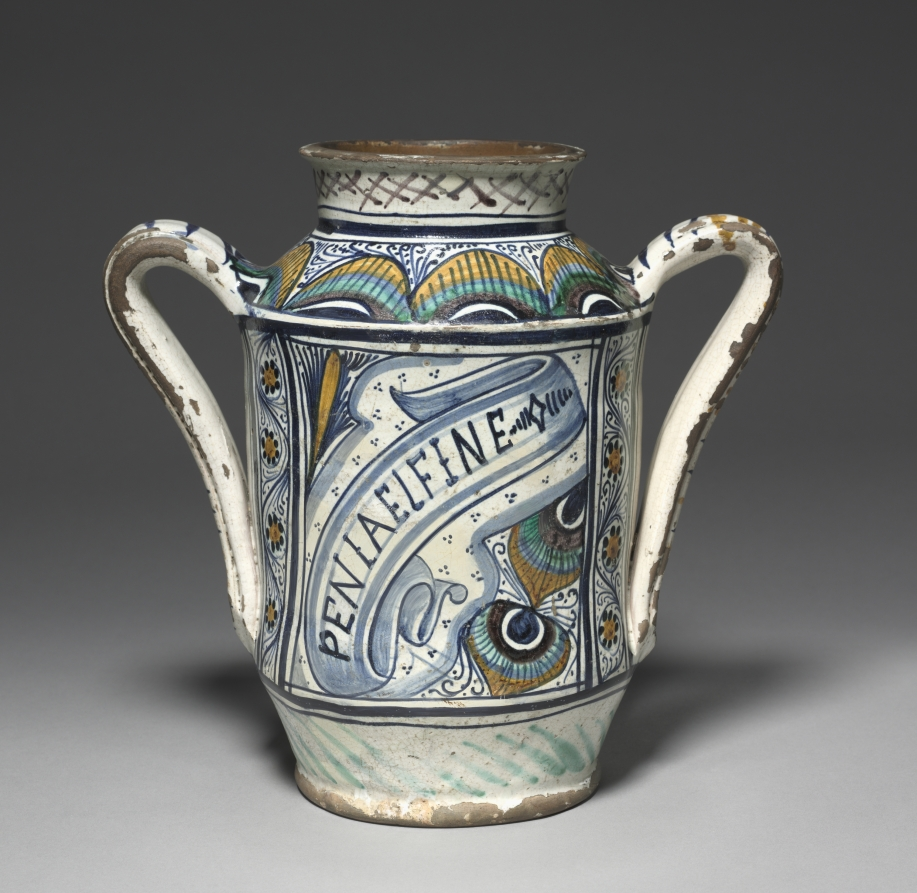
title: Pharmacy Jar (Albarello)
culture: Italy, Florentine region, Cafaggiolo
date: c. 1475–80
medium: tin-glazed earthenware (maiolica)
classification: Ceramic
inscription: in ribbon scroll on back: PENIAELFINE.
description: Storage jars that lined the shelves of Renaissance pharmacies often held medicinal herbs, spices, and ointments. Their shape made them easy to grasp while the flared lip allowed apothecaries to seal off the contents with parchment or cloth secured by a string. A scroll on the back of this vessel indicates that it may have once held a peony compound.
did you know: At various points in history, medicinal peony compounds have been prescribed for dizziness, weakness, hysteria, jaundice, and kidney stones.